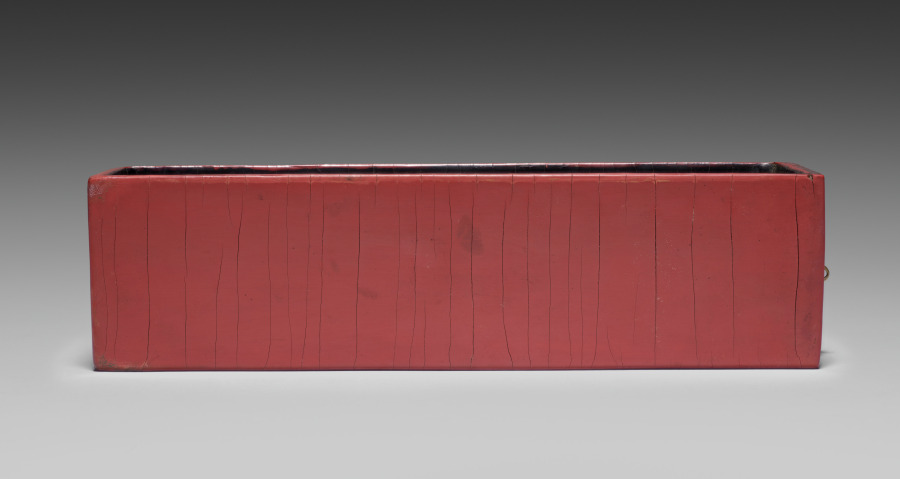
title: Drawer for a Tihong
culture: China, Ming dynasty (1368-1644), Wanli reign (1572-1620)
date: 1585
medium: carved cinnabar lacquer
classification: Lacquer